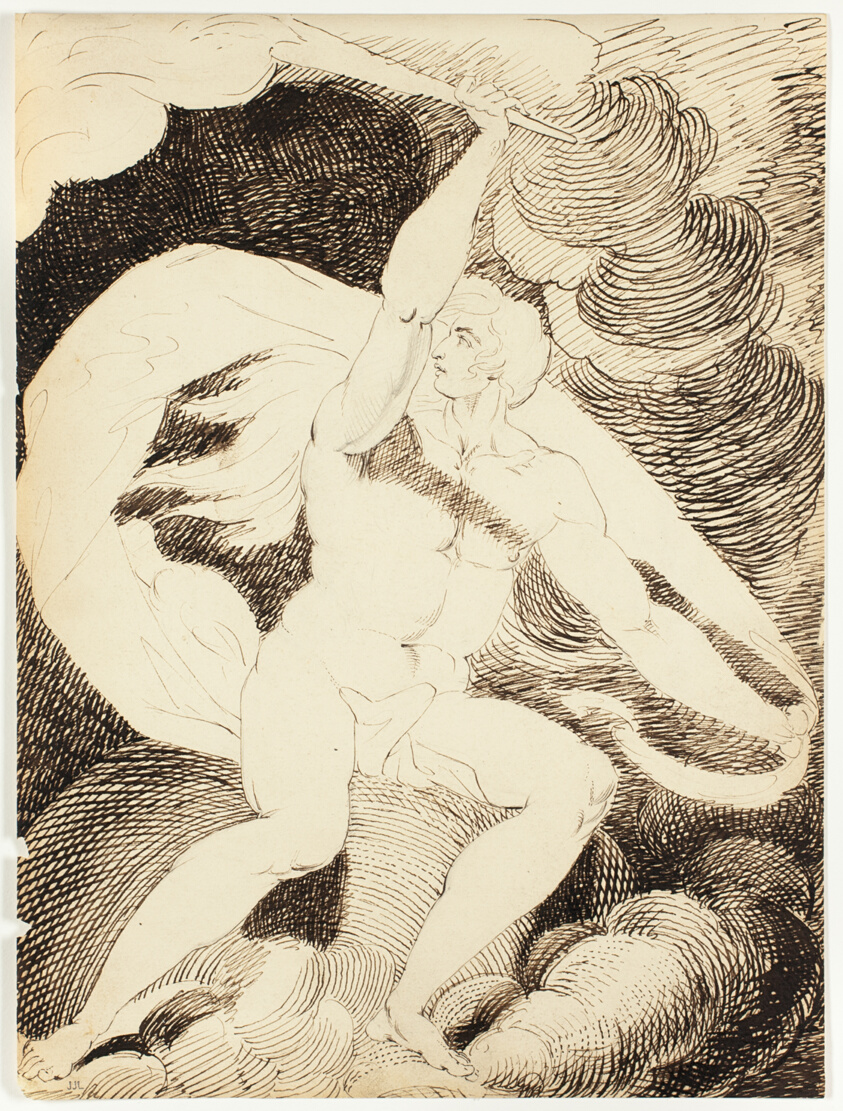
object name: Drawing and Watercolor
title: Nude Figure of a Man with Flaming Torch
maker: William Blake (English, 1757-1827); or William Young Ottley (English, 1771-1836)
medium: Graphite on paper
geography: England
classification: graphite; drawings (visual works); prints and drawing